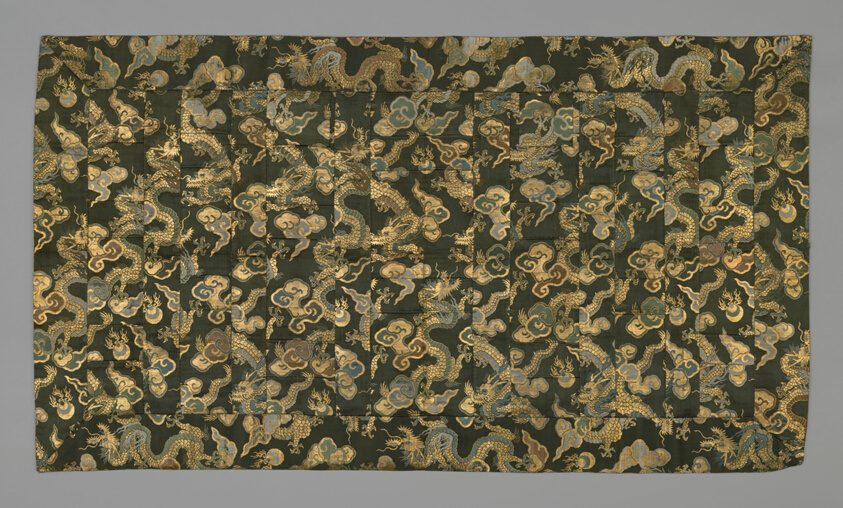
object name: Religious/Ritual Object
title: Kesa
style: edo (japanese period)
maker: Japan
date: late Edo period (1789–1868), early 19th century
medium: silk and gilt-paper; compound satin weave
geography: Japan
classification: textile; costume; weaving; liturgical - buddhist; ritual objects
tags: imperial families